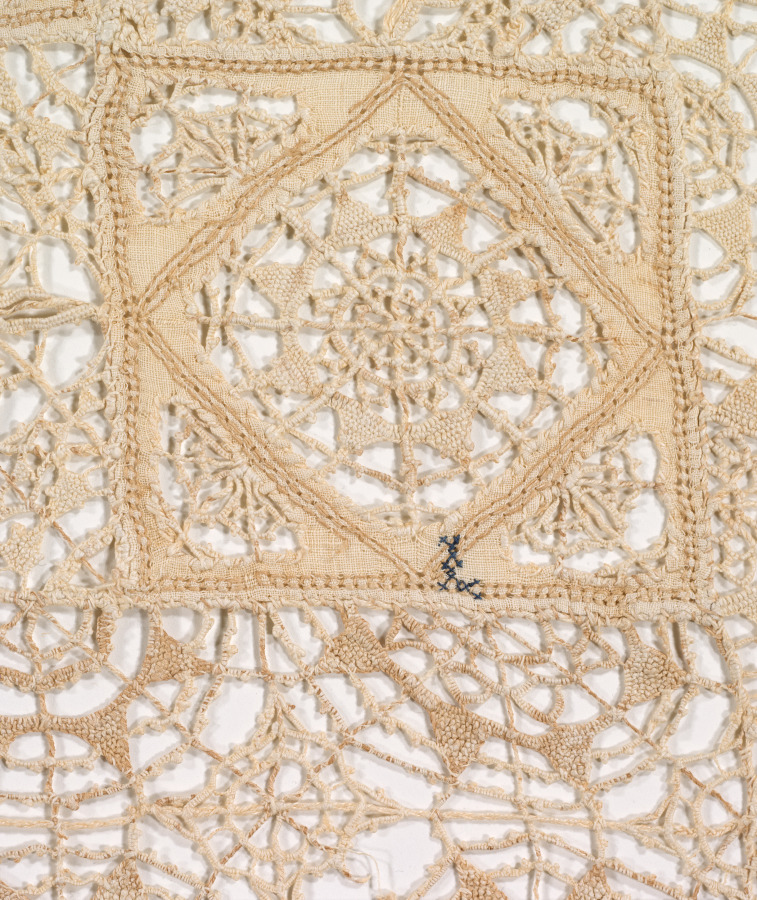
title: Lace Cloth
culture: Italy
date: 1560–1600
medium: Linen; needle lace (cutwork and reticella)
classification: Lace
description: Consisting of more than 80 squares of cutwork (a cut and embellished linen ground) and rectangles of reticella (needle lace), this luxurious cover could have been made by a single person or several people who divided the work. Close looking reveals that the cloth is made with threads of two very slightly different colors: bleached and unbleached linen. Together the sections resemble snowflakes, which are of similar shape and size but vary subtly from one another. The perplexing dark stitches in the upper left corner do not repair damage, and might be the maker’s signature.